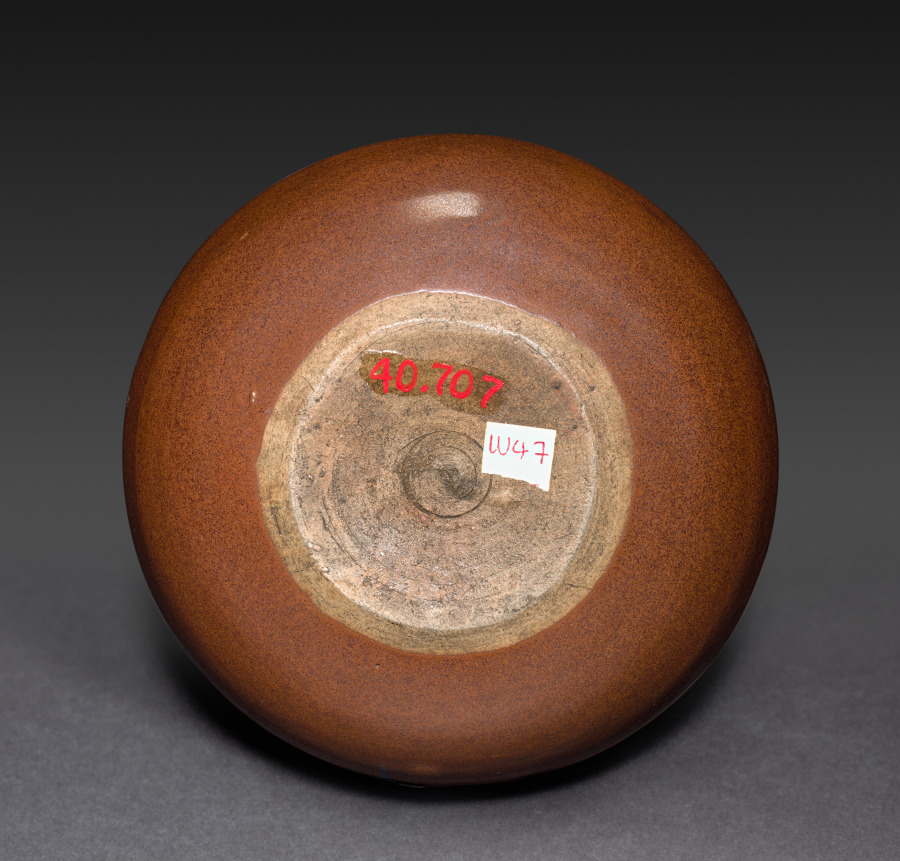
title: Jar with Stopple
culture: Japan, Edo period (1615–1868)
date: 1700s to mid-1800s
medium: stoneware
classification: Ceramic